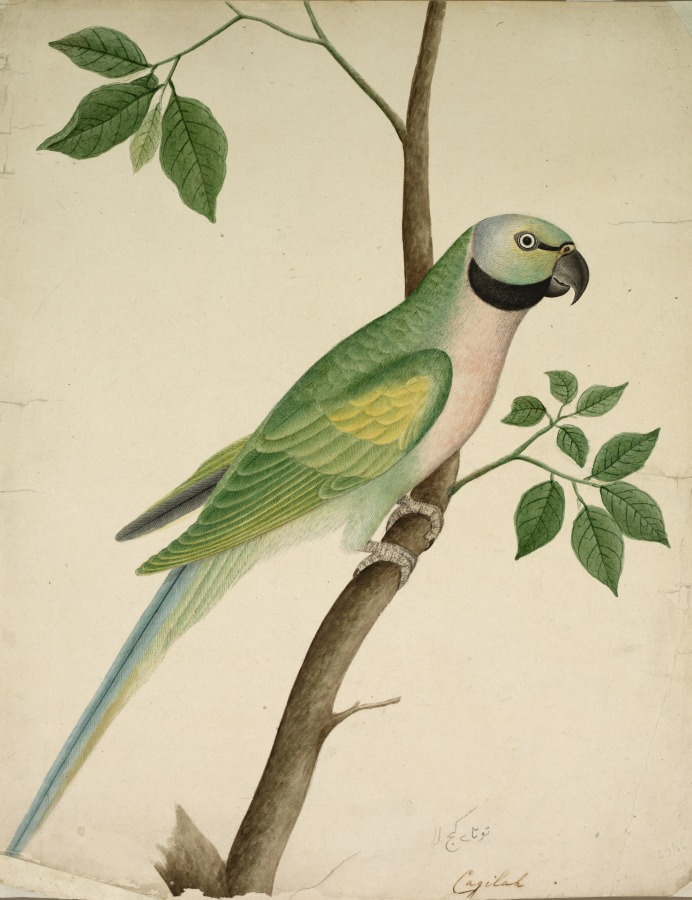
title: Green Parrot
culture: India, East India Company School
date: c. 1820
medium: Gum tempera on paper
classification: Painting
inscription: recto, lower right in persian: Cagilah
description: Made by an Indian artist for a British civil servant working in Calcutta (now Kolkata), this bird is portrayed with precision and brilliant color. It appears to be of the same type as Tuti, the protagonist of the early Mughal Tuti-nama (Tales of a Parrot) manuscript. This example, however, has a black beak, indicating she is female, while the male Tuti has a red beak. Though loosely translated as “parrot,” Tuti is technically a Lord Derby’s parakeet. Because of its ability to talk, the parrot often appears in Indo-Iranian tales as a messenger of moral wisdom.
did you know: This painting was owned by a founding partner of Cleveland law firm Hahn Loeser & Parks.